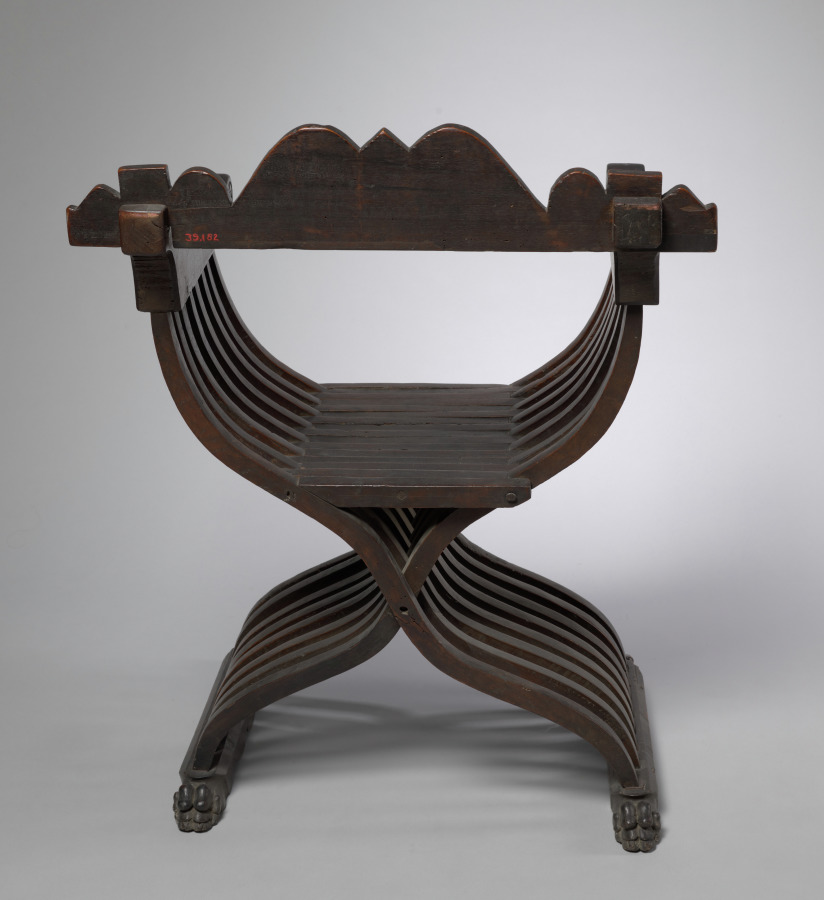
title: Folding Armchair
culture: Italy, early 16th century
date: early 1500s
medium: walnut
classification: Furniture and woodwork